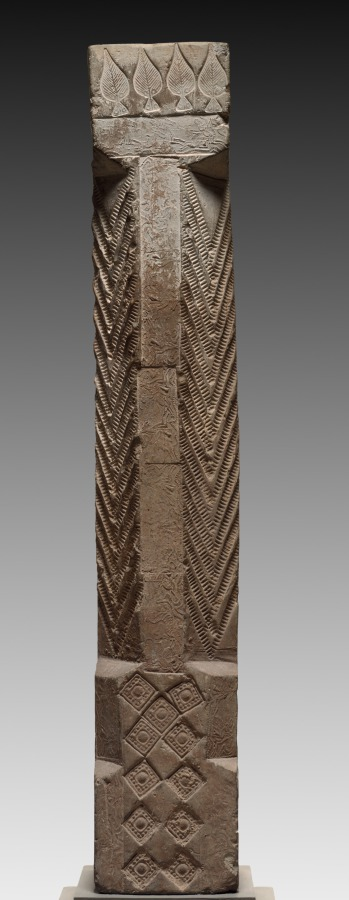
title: Hollow Tile: Column from Tomb-Chamber Doorway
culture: China, Han dynasty (202 BCE–220 CE)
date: 100–200 CE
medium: earthenware, die-stamped relief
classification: Ceramic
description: Striding tigers (top), racing horsemen (right column), and reverent officials (left column) are stamped into the surface of this underground portal to a tomb. The doorway preserves in stone the post-and-lintel structure, a basic element of Chinese wooden architecture. By the first century CE, a revolution in Chinese tomb construction and furnishing had taken place. Tombs lined with decorated bricks and tiles replace the earlier tombs constructed with only rammed-earth walls. Ceramic surrogates or models of stoves, houses, servants, and pets filled these more durable chambers, symbolically extending the creature comforts of this world into the world after death.